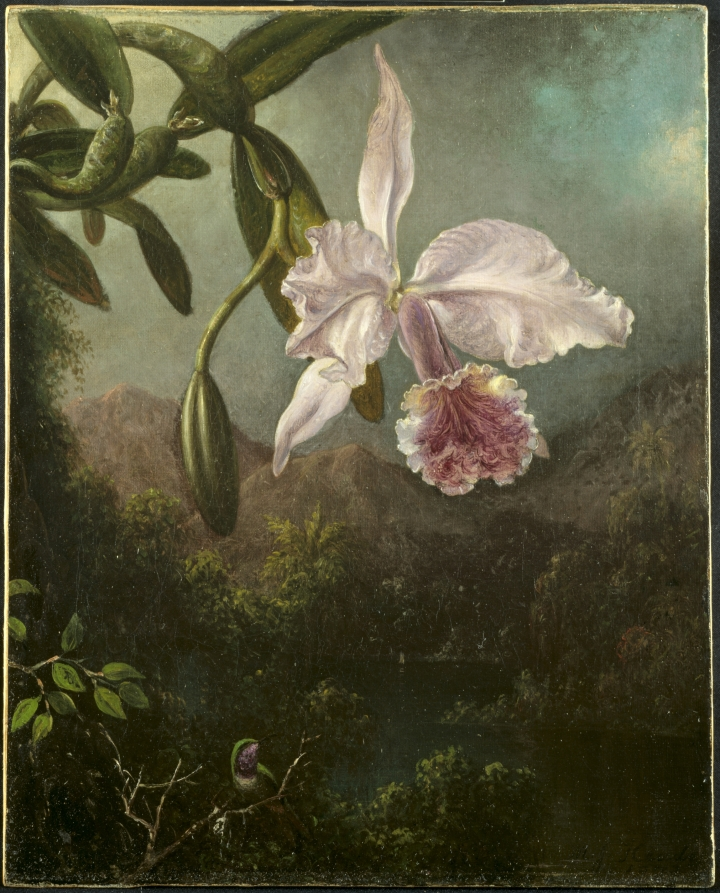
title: Orchid Blossoms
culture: America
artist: Martin Johnson Heade (American, 1819–1904)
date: 1873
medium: oil on canvas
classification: Painting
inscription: signed lower right: M.J. Heade / 1873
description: At the time he created this work, Martin Johnson Heade had made three trips to Central and South America. As an outgrowth of these experiences, he made a large number of paintings of birds and flowers, especially orchids, in a tropical setting.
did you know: Ten years after painting Orchid Blossoms, artist Martin Johnson Heade married at the age of 64.